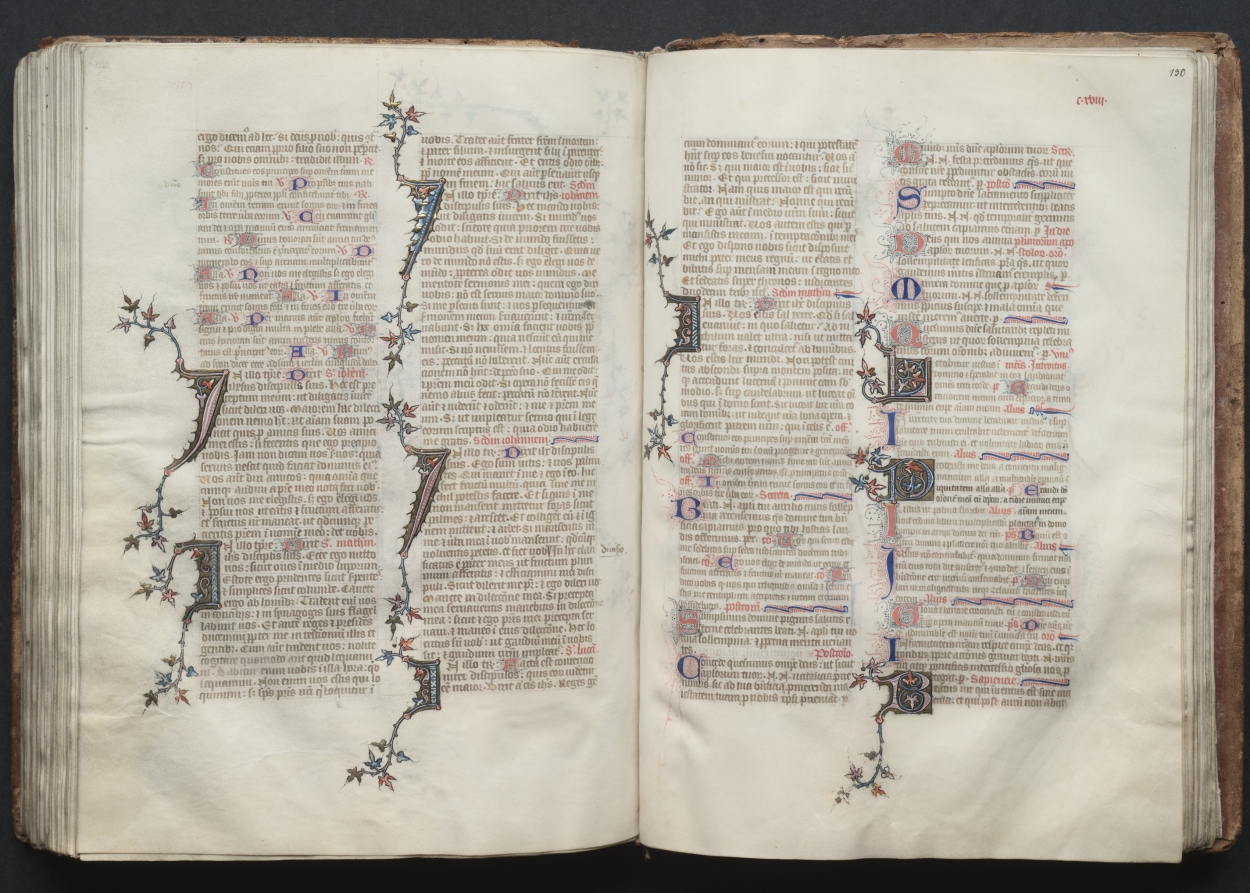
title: The Gotha Missal: Fol. 129v, Text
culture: France, Paris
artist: Master of the Boqueteaux (French)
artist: and Workshop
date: c. 1375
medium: ink, tempera, and gold on vellum; blind-tooled leather binding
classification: Bound Volume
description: The style and quality of this manuscript's decoration is typical of deluxe Parisian books made for aristocratic or royal patrons. Most of the book's decoration appears to be the work of the Master of the Boqueteaux, an artist active at the court of King Charles V (died 1380). His style was apparently shared by a number of book illuminators working in and around Paris. It is very possible that the Gotha Missal belonged to Charles V, but is not provable because the manuscript has no royal portraits and lacks a colophon. Given the book's magnificent decoration, however, it would seem that it was produced for a Valois prince, if not for the king himself. The manuscript receives its name from the German dukes of Gotha, its later owners.